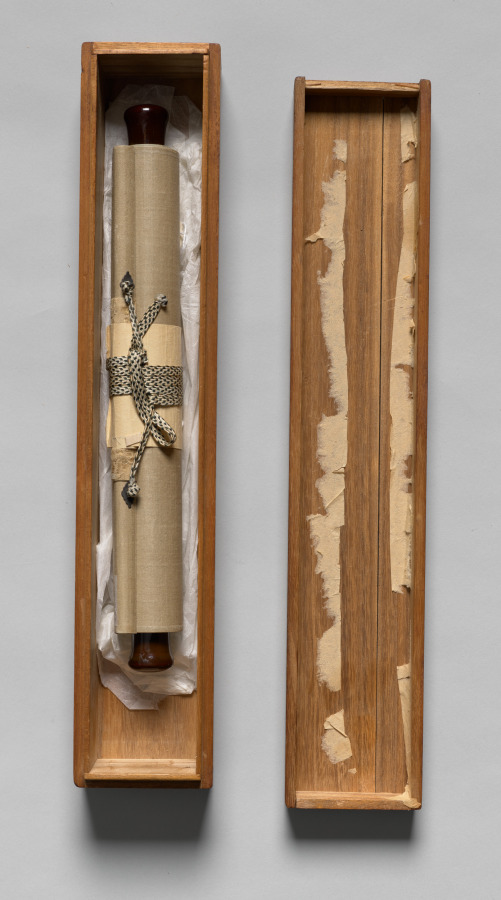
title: Bodhidharma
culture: Japan, Muromachi period (1392–1573)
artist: Unkei Eii (Japanese, active 1504–1520)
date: early 1500s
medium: hanging scroll; ink on paper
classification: Painting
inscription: signed: "Unkei" two-line inscription signed: Shunpō Sōki (1416-1496), 40th abbot of Daitokuji temple